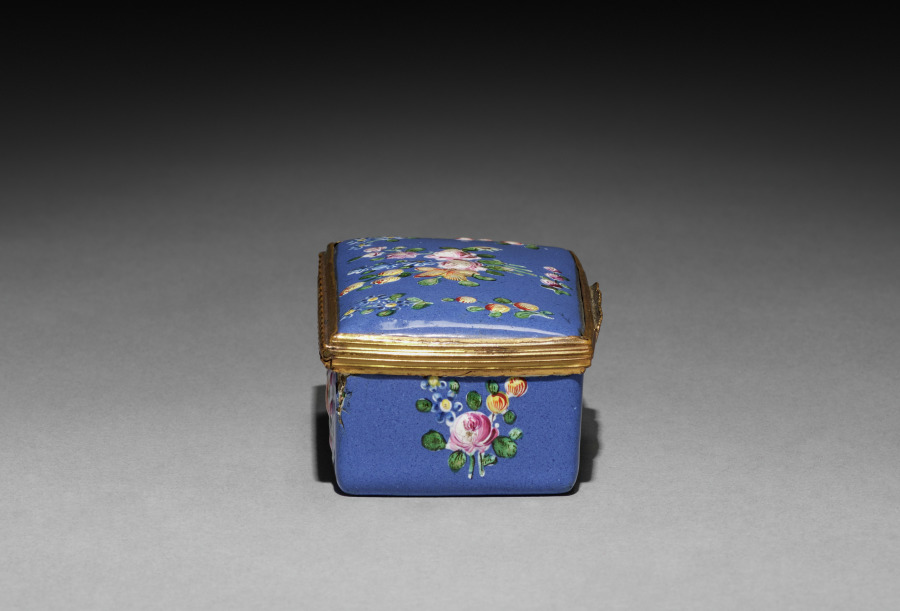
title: Snuff Box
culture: Germany ?, 19th century (?)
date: 1800s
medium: enamel on copper with metal mounts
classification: Miscellaneous